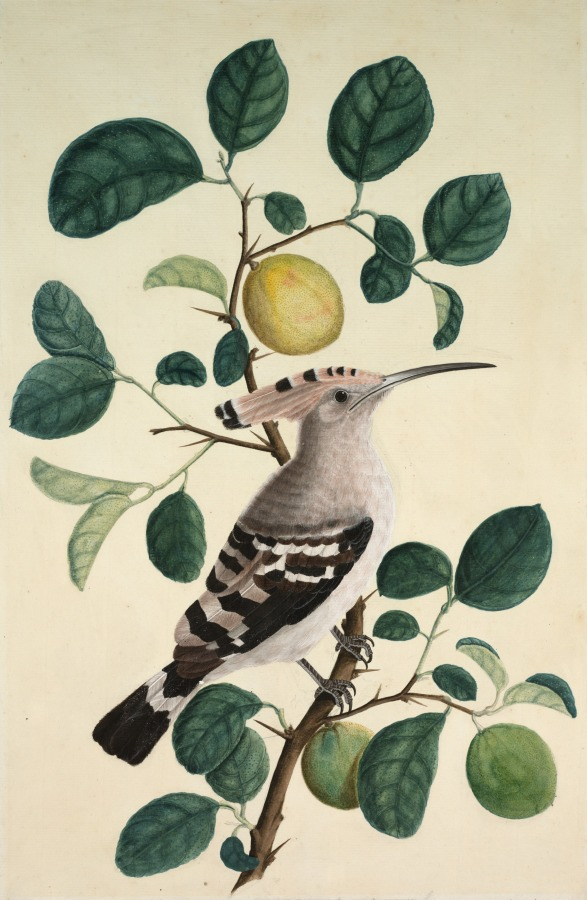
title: Hoopoe on a Citrus Tree Branch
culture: India, Company school, Calcutta, early 19th Century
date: c. 1800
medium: color on paper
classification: Painting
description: Indian artists of the late 1700s and early 1800s painted images of native birds, plants, and animals for British collectors who mainly lived in the fortified enclave of Calcutta (now Kolkata), which then functioned as the center of British power in India. During this period, known as the Age of Enlightenment, natural history subjects were a fashion in art throughout the colonial British world, in response to the pervasive interest in scientific discovery. This small crested bird is named after the sound of its call, “hoopoe,” an onomatopoeia. The dense, regular, and controlled brushwork that lends realistic texture to the plumage and claws reveals the artist’s training in Indian court traditions.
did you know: This small crested bird is named after the sound of its call, “hoopoe,” an onomatopoeia.